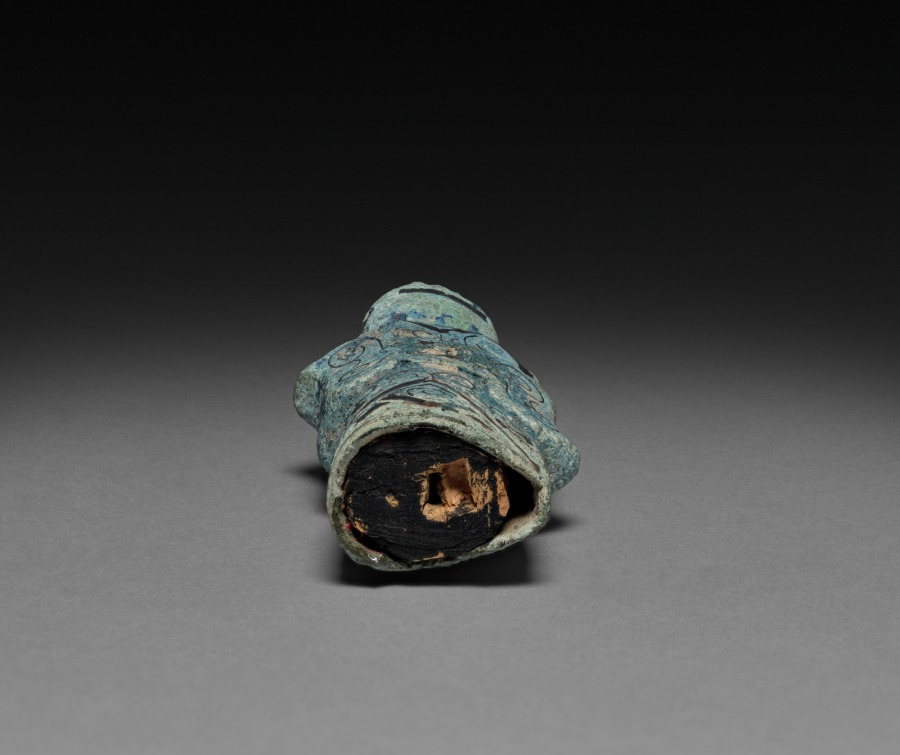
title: Halberd Standard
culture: China, Zhou dynasty (c. 1046–256 BCE)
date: c. 600–221 BCE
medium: bronze inlaid with silver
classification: Metalwork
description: This finial, being pear-shaped in section, is known to have been the handle of a halberd. Its ornament consists of broad bands intersecting to make angles, and of delicate lines ending in whorls. The asymmetrical part through the middle is derived from a bird, its head being at the upper right, its tail at the lower left. The whole object is coated with a green and blue patina of rare beauty.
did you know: The craftsman used silver inlay to create an eminently satisfying pattern of dashing straight lines and restless curves.